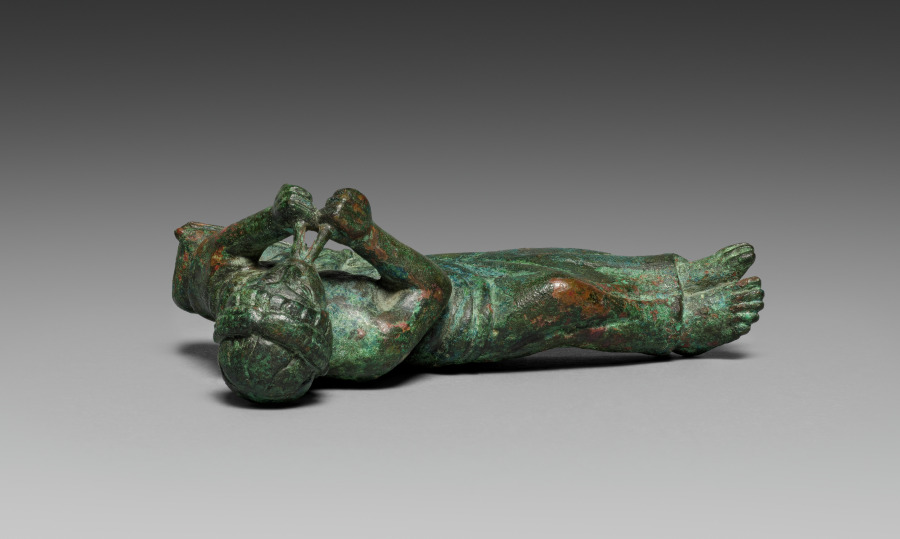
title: Vessel Ornament of Reclining Pipes Player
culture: Etruscan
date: probably 400–375 BCE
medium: bronze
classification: Sculpture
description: This bronze banqueter figurine was one of six once adorning the rim of a large basin, now lost. Cast in molds with individualized details, most have grooves on their underside to attach to the basin. Minute traces of gilding remain on areas of clothing and skin (mostly visible only under magnification), suggesting that they may have been completely gilded. Two handles in the form of hippocampi, horses with serpentine tails, also belonged to the basin and are now displayed at the Michael C. Carlos Museum at Emory University. The basin may have been used to hold liquid for a banquet, or was perhaps funerary. This bronze reclining figurine raises his head and blows into a set of pipes. The tips of the pipes are broken off. Some gilding remains on the mouth and chin. The figurine wears a himation over his body and has a bare chest. Two pillows prop up his left elbow. His hair falls over his forehead in square bangs.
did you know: Guests were often invited to play instruments and sing during symposia.